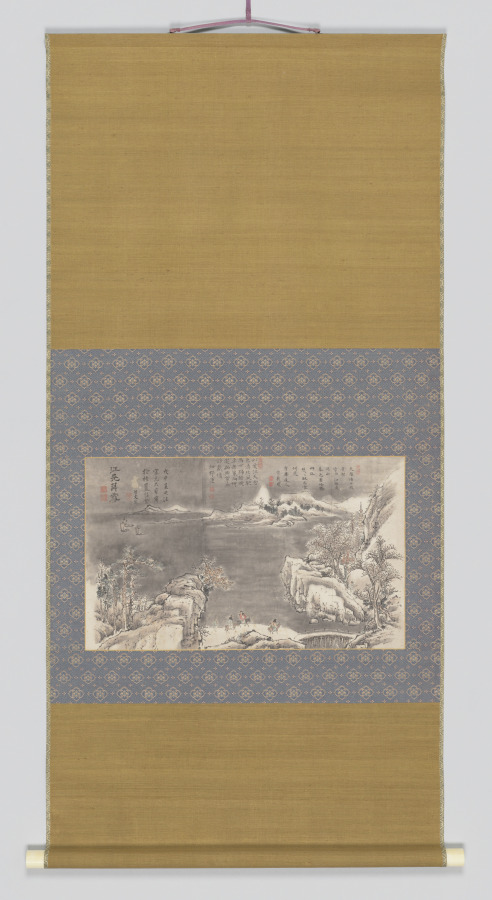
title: Evening Snow Blending River and Sky, from Eight Views of Xiao-Xiang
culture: Japan, Edo period (1615–1868)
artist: Tani Bunchō (Japanese, 1763–1841)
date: 1788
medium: album leaf remounted as a hanging scroll; ink and color on paper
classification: Painting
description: This painting was part of a set of album leaves representing the Eight Views of Xiao-Xiang, a theme originating in Chinese poetry and painting that spread to both Korea and Japan. Southern China’s Xiao-Xiang area, where the mist-covered banks of the Xiang River created a complex landscape shifting like the moods and minds of people, captured the imaginations of generations of painters and calligraphers. Inscriptions on these works suggest that they were possibly ordered by newly prominent Japanese Confucian scholars.